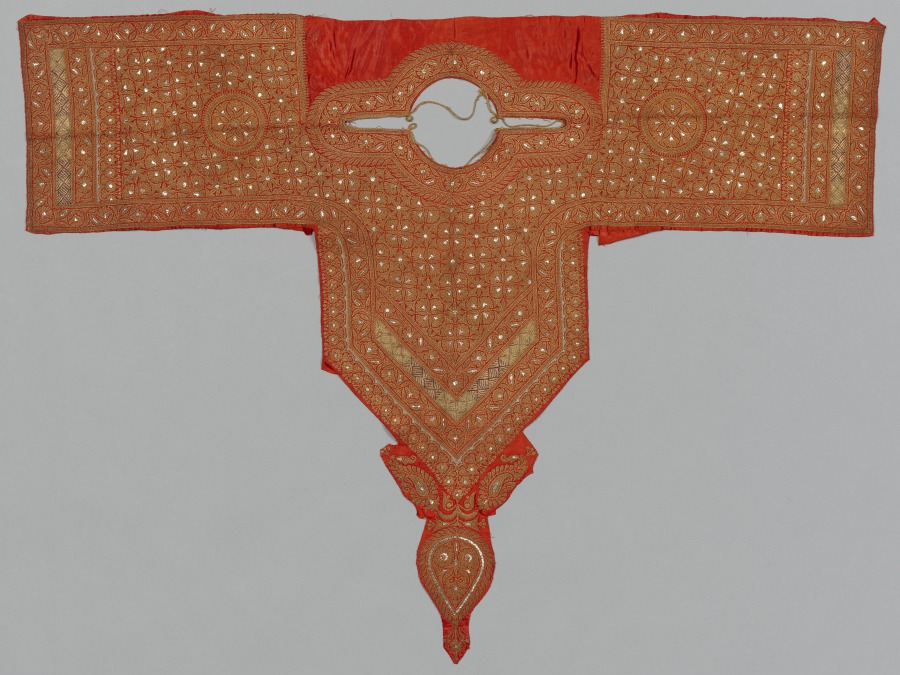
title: Part of a Woman's Dress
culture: Western India, Gujarat, Kachchh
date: 1800s–early 1900s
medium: silk and metal on silk ground, embroidery, cotton backing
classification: Embroidery